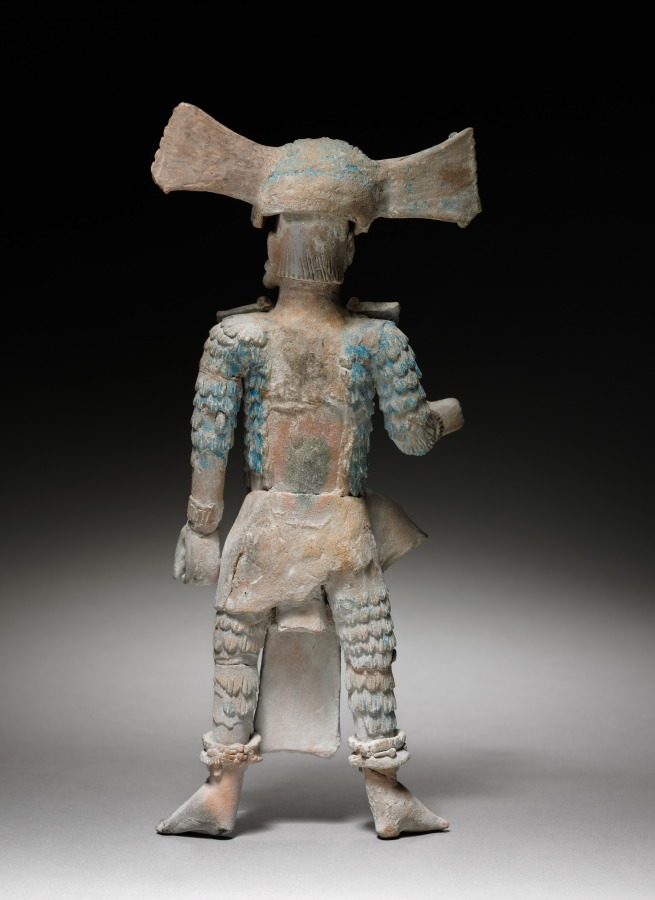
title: Warrior Figurine with Removable Headdress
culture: Mexico, Yucatán, Jaina Island region, Campeche, Maya style (250-900)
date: 600–900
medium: earthenware with pigment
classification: Sculpture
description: The major offerings placed in the Maya graves of Jaina Island were ceramic figurines, some of Mesoamerica's finest, that depict deities and humans in a variety of roles. This warrior, his headdress removable, once probably held weapons and wears either quilted cotton armor or the feathered uniform of a military order. We don't know why such figures are often pot-bellied.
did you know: Maya blue pigment was made by combining clay with indigo in a complex technique developed around the ninth century.